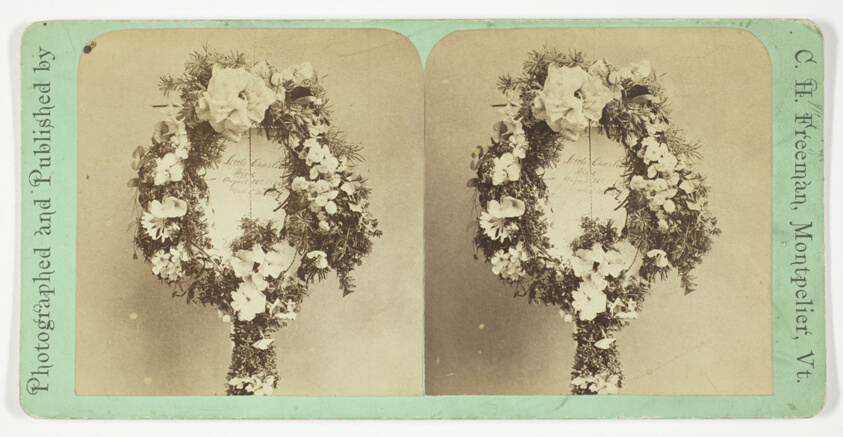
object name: Photograph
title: Untitled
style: 19th century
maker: C. H. Freeman; American, late 19th century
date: 1874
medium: Albumen print, stereo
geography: Montpelier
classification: photography; photograph